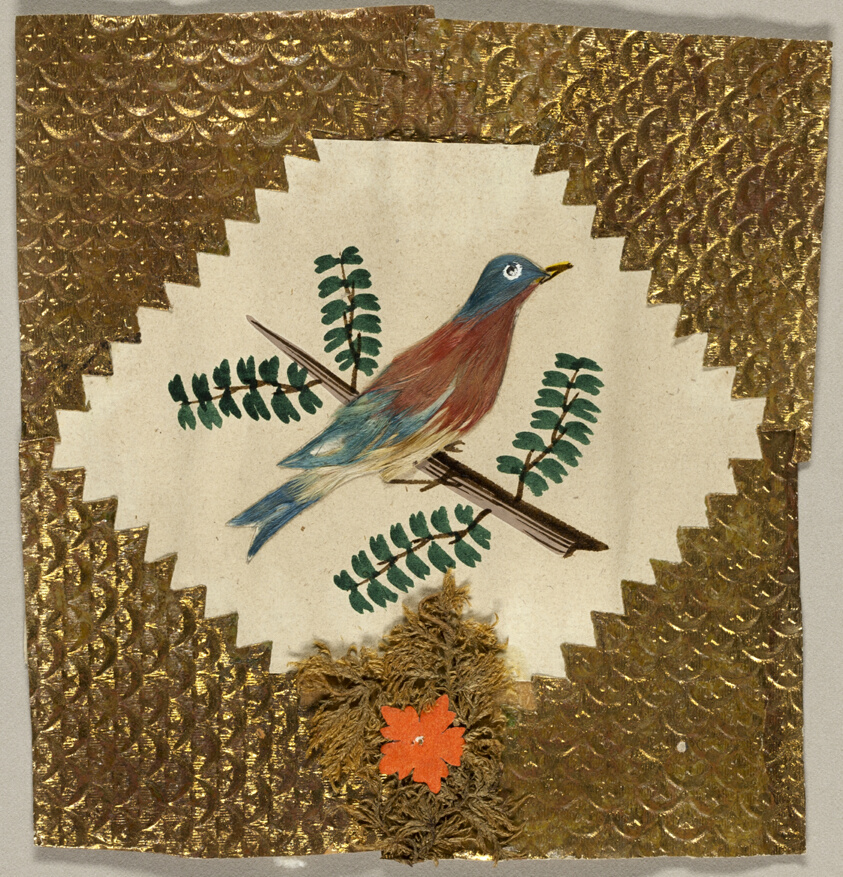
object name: Drawing and Watercolor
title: Untitled Valentine (Robin on a Branch)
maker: Unknown Artist; German, 19th century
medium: Collaged elements with watercolor on ivory wove paper, laid down on card (partially removed)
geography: Germany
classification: valentine; prints and drawing; paper